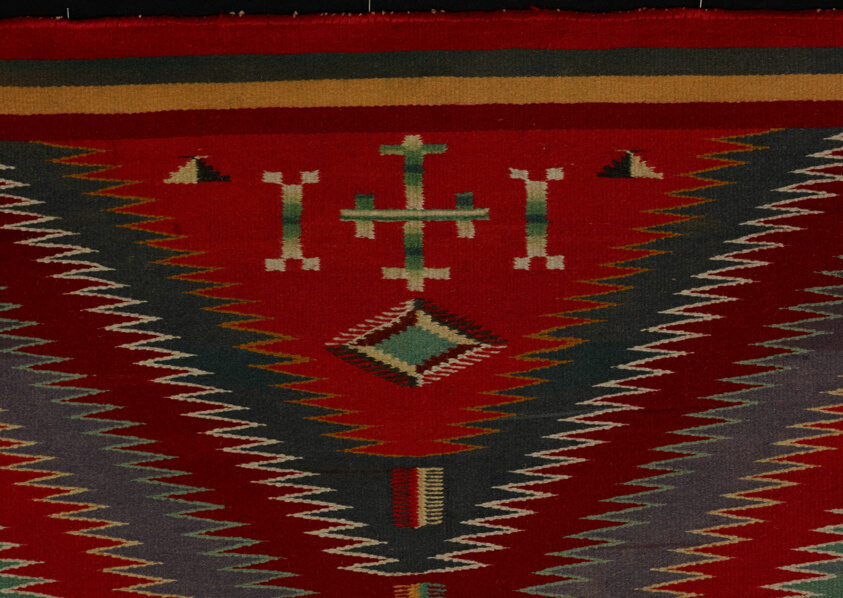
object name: Textile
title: "Eye-Dazzler" Weaving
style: navajo, native american, americas, Folk Art, 19th century, indigenous, north american, native north american, eye-dazzler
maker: Navajo (Diné) (Arizona, New Mexico, and Utah, United States)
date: 1880/1900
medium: Cotton and wool, single interlocking tapestry weave; twined selvages and heading, overcast finish terminating in tassels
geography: Navajo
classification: textile; weaving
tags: geometric, zigzags